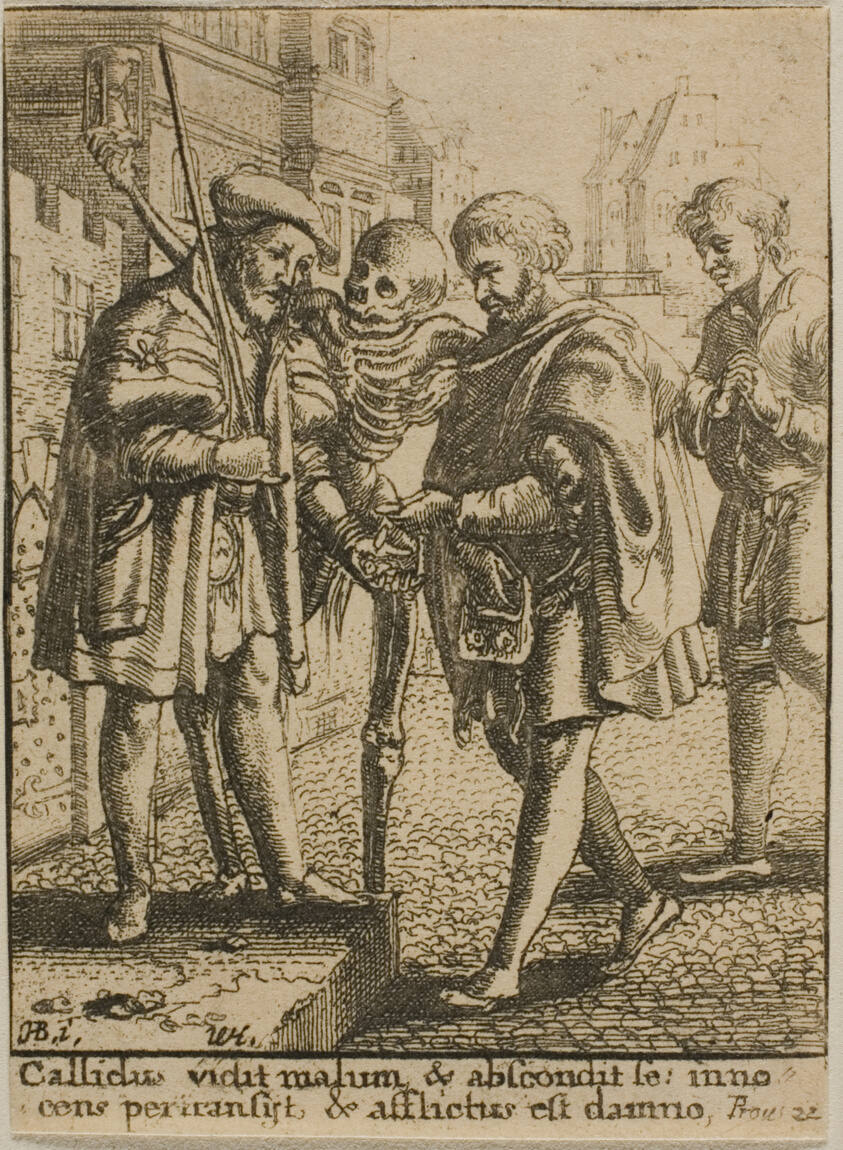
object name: Print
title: The Advocate and Death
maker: Wenceslaus Hollar (Bohemian, 1607-1677); after Hans Holbein the younger (German, c.1497-1543)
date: 1651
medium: Etching on ivory wove paper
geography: Bohemia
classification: etching; print; prints and drawing